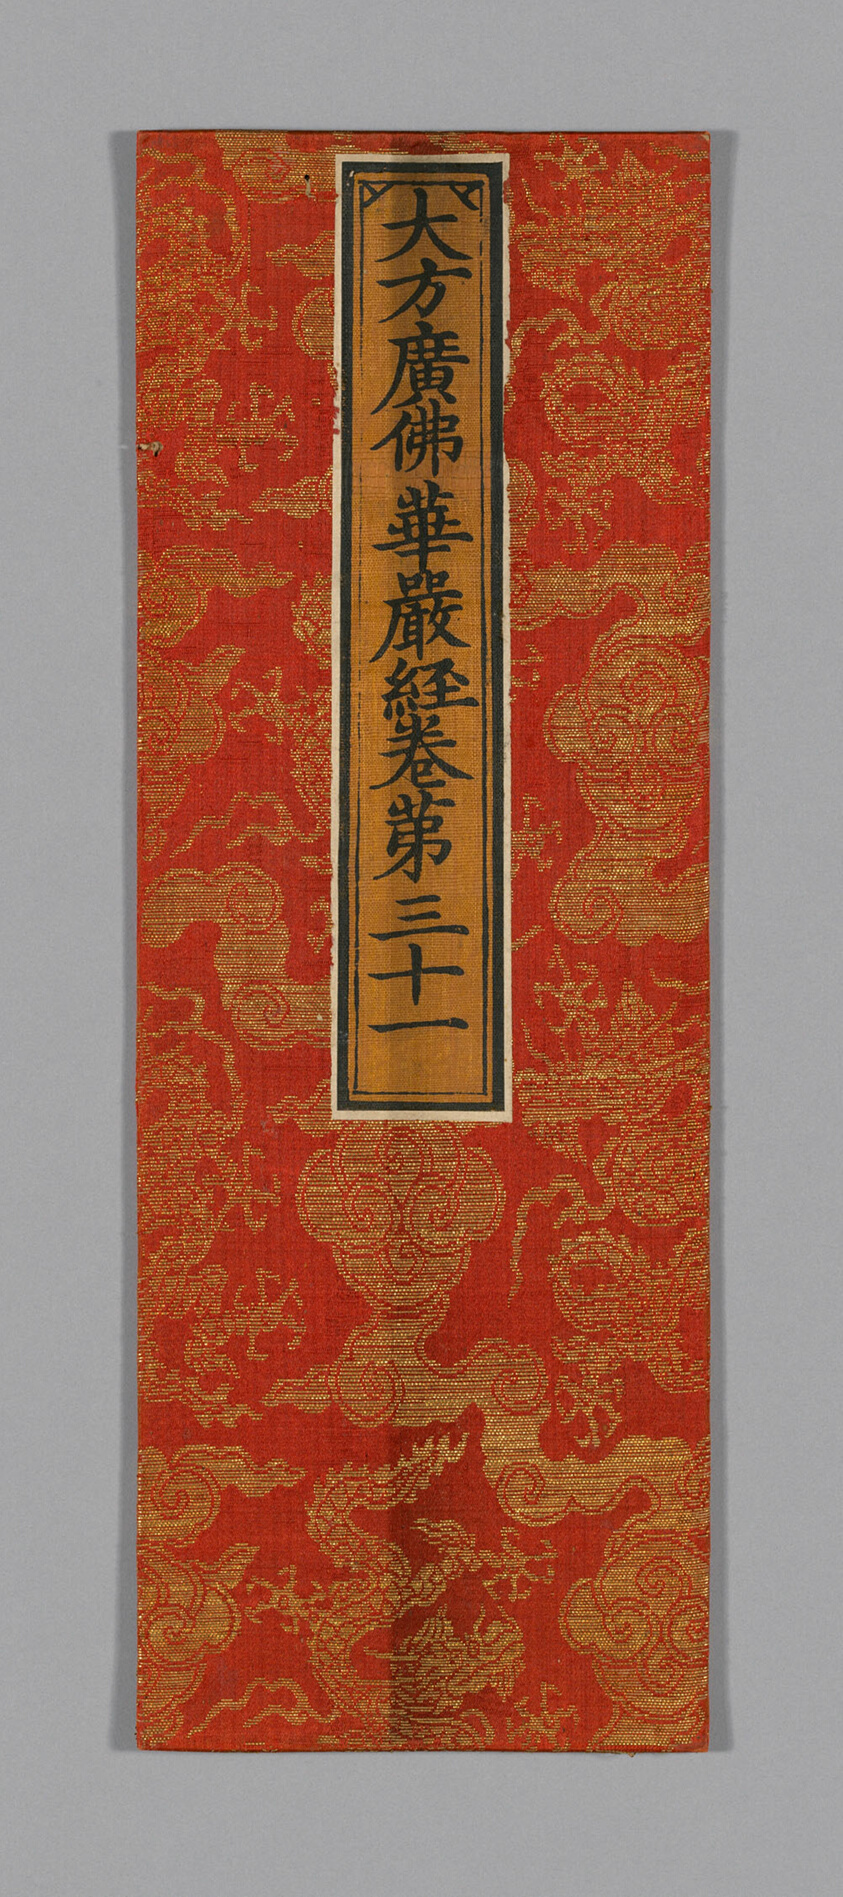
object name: Textile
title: Sutra Cover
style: ming, Chinese (culture or style), East Asian, asian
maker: China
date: Ming dynasty (1368–1644), c. 1590's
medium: Silk and gold-leaf-over-lacquered-paper strips, warp-float faced 4:1 satin weave with supplementary patterning wefts bound in weft-float faced 1:4 satin interlacings; label: silk, plain weave; painted in ink; glued over paper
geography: China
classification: textile; weaving